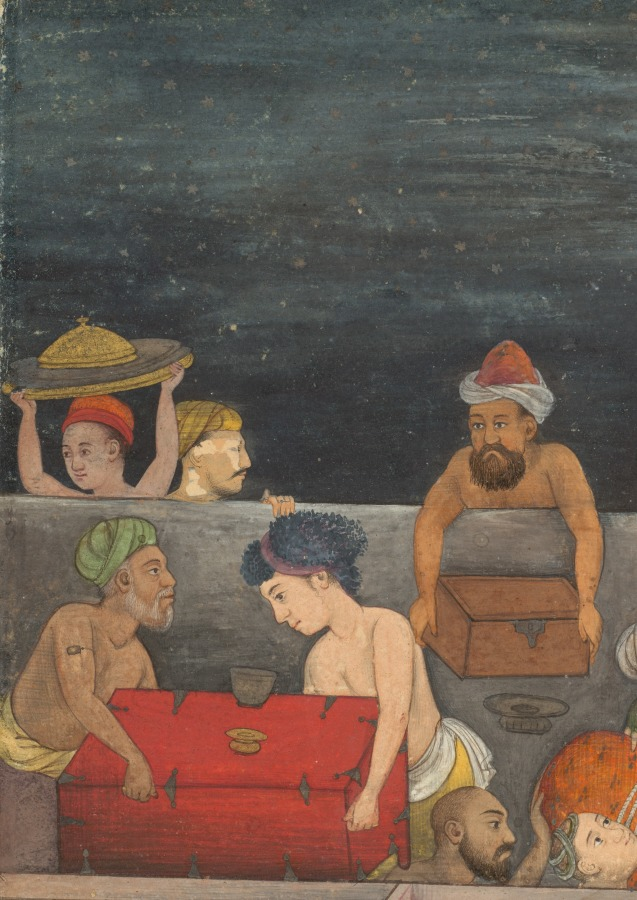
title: A House Burgled at Night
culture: Mughal India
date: c. 1700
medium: Gum tempera and gold on paper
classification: Painting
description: In this night scene a band of robbers have climbed over the walls of a Mughal house and, from a courtyard, are successfully carrying out the possessions of its owners while a lady flees through the door. The speed of her movement is expressed in the swinging motion of her diaphanous skirt and the scarf clutched in her hand, as well as by the shoes abandoned on the ground in her haste. This depiction of unruly behavior and its effects are perhaps an expression of the violent succession of emperors that threw the Mughal court into distress at the beginning of the 18th century.